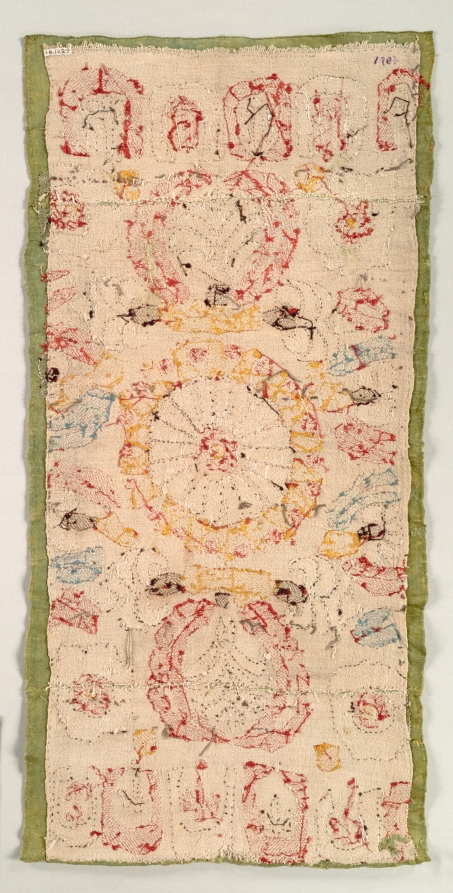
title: Cushion Cover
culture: Turkey, 18th century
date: 18th century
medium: embroidered twill weave silk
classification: Embroidery